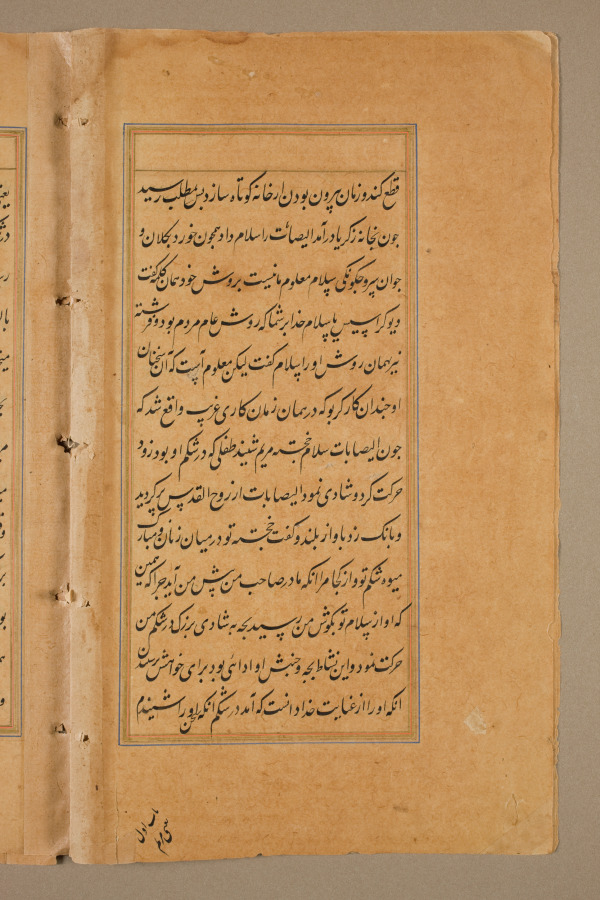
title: Text page from a Mirror of Holiness (Mir’at al-quds) of Father Jerome Xavier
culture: Mughal India, Allahabad, made for Prince Salim (1569–1627)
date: 1602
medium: Ink and gold on paper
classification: Manuscript